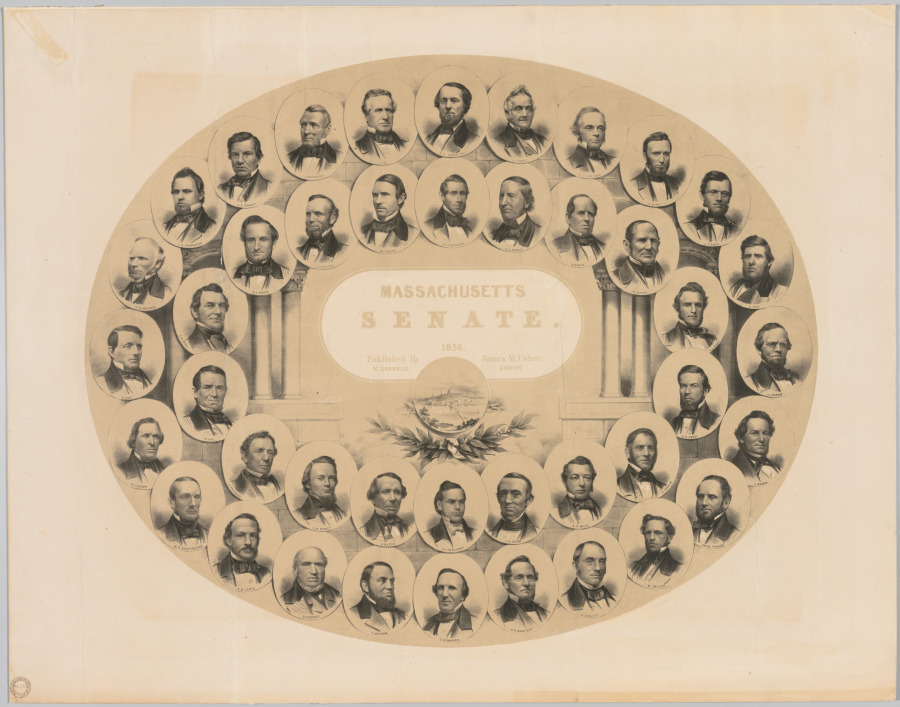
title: Massachusetts Senate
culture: America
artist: Winslow Homer (American, 1836–1910)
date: 1856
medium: lithograph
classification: Print